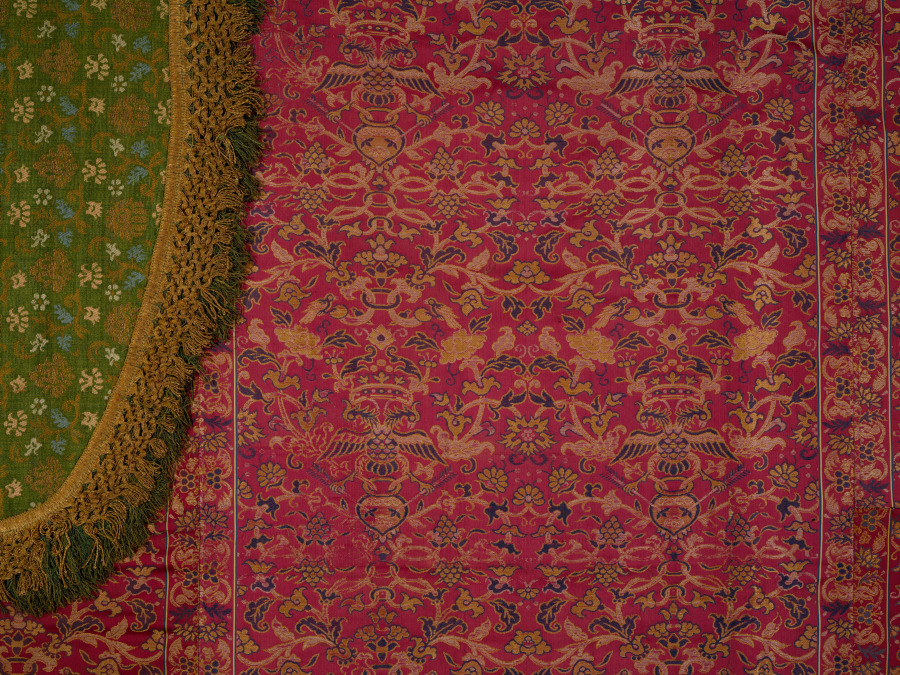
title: Cope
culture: China, Macao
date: 1500s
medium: Silk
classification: Garment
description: Silk fabric woven in China with European motifs was transported by European traders by the early 16th century. This popular pattern features a crowned double-headed eagle grasping arrows in its claws above a vase emitting blossoming vines. The eagle motif was derived from the Habsburg coat of arms, rulers of Spain and Austria during the 1500s and 1600s. Vertical borders with Chinese flora occur near the selvages of the five silk lengths forming the cope. The gilt-metal braided and fringed hood and broad orphrey band, or ornamental border, along the front edges feature fashionable small-scale floral sprigs.